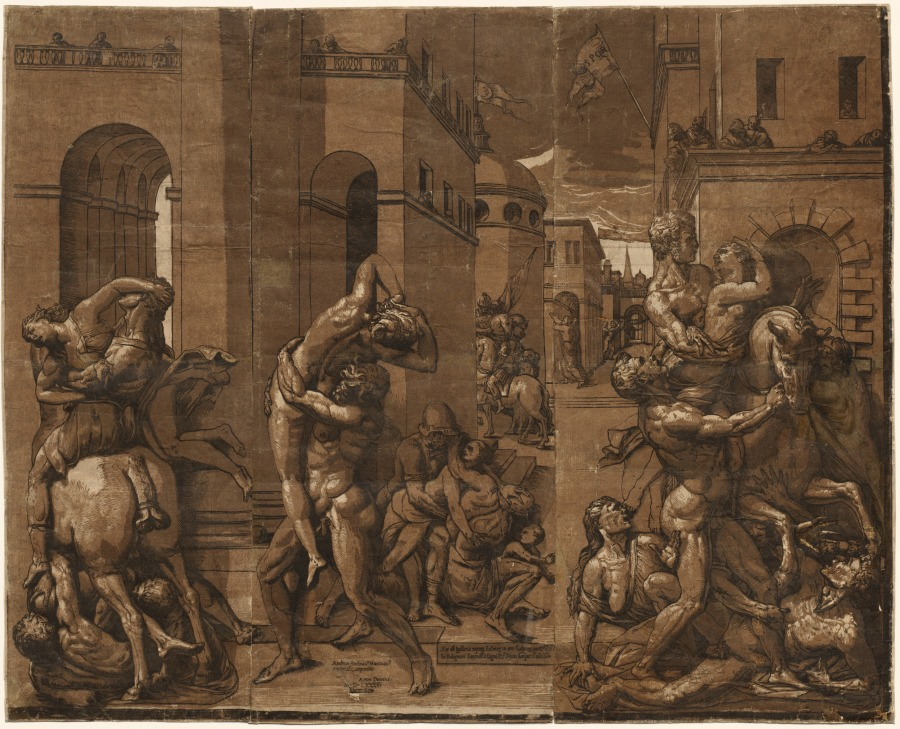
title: The Abduction of the Sabine Women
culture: Italy, 16th century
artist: Andrea Andreani (Italian, about 1558–1610)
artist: after Giambologna (Flemish, active Italy, 1529–1608)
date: 1585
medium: chiaroscuro woodcut (in three shades of brown and black)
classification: Print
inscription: Central sheet in darker tone block: Andreas Andrean' Mantuan' / eam incisit impressit °/ Anno Domini ° / M°D°LXXXV° / Florentiae; hec est hystoria rapta(um) Sabinar(um) in are sculptar(um) per Doum / Io: Bolognam Sereniss. Magni Etre Ducis sculptore celeberr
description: The legend of the Sabine women relates to Rome’s early history when, to ensure the future population of the city, its founder Romulus hosted a festival for neighboring peoples, including the Sabines. At an appointed moment during the festivities, each young man of Rome kidnapped an unmarried Sabine woman to be his bride. Later, when the Sabines attacked Rome, it was the abducted Sabine women who courageously stopped the brutal battle and demanded peace between their fathers, brothers, and husbands. Andreani’s chiaroscuro woodcut, with its brown-red tone, subtle shadows, and warm highlights, was a fitting choice for reproducing Giambologna’s original bronze relief, created for the pedestal of his sculpture The Abduction of a Sabine Woman.